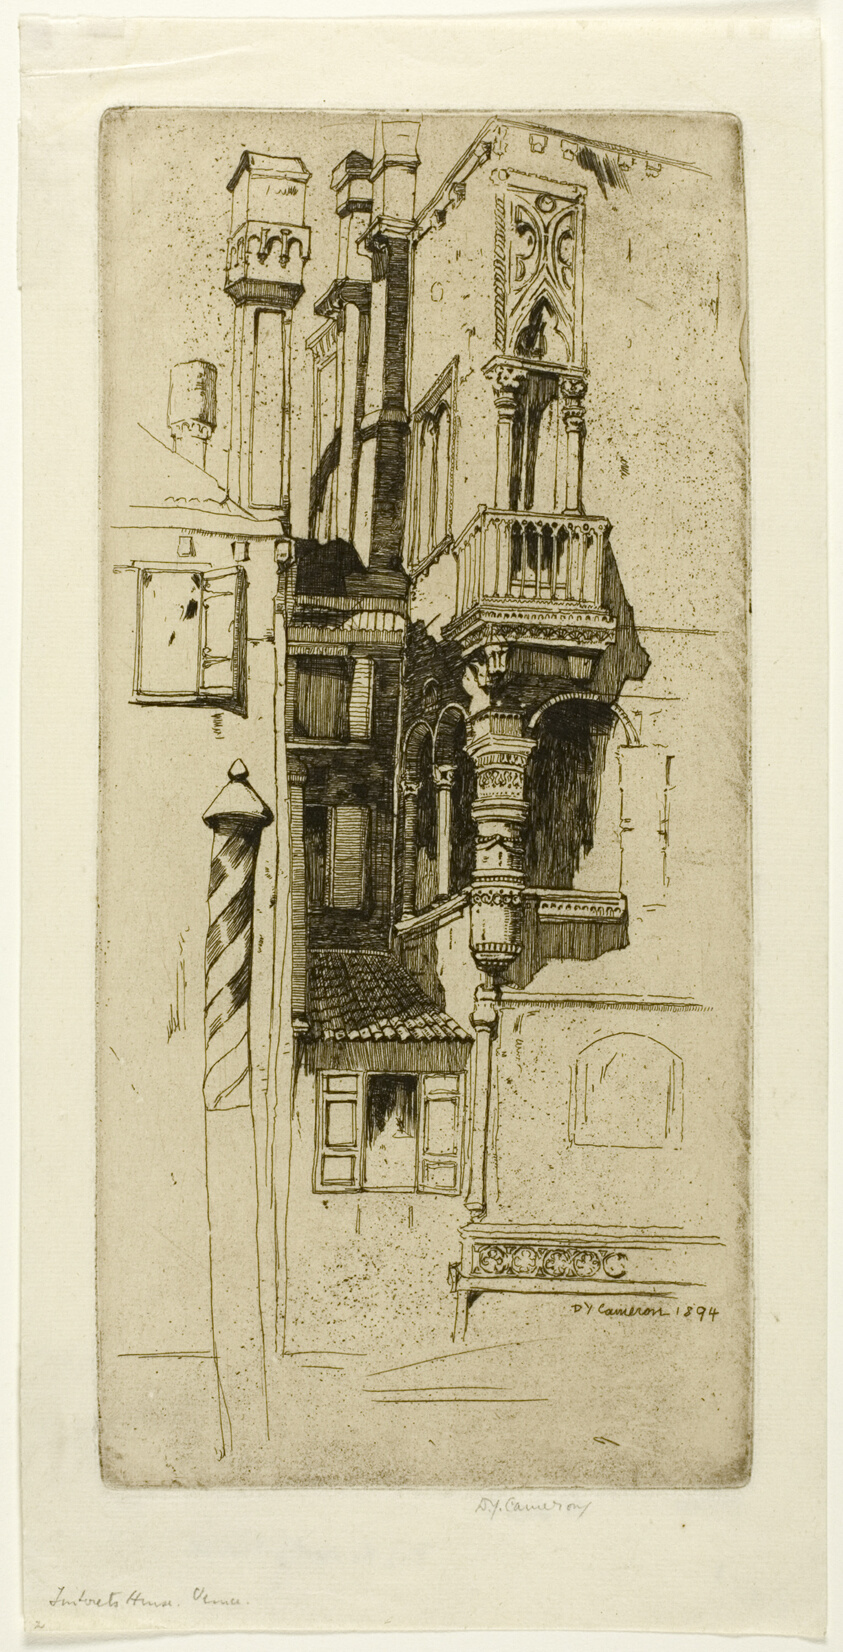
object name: Print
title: Tintoret's House, plate six from the North Italian Set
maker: David Young Cameron (Scottish, 1865-1945)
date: 1894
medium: Etching on ivory laid paper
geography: Scotland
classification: etching; print; prints and drawing